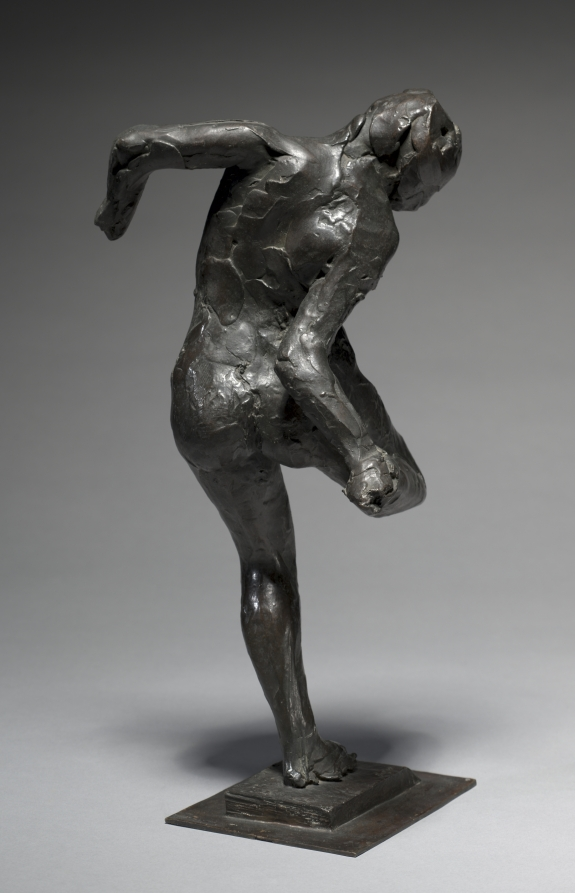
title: Dancer Looking at the Sole of her Right Foot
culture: France, 19th century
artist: Edgar Degas (French, 1834–1917)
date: 1896–97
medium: bronze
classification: Sculpture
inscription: Signed on base at left: Degas. Inscribed behind right foot: 67/B.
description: Degas produced numerous wax sculptures during his lifetime that were cast in bronze shortly after his death. This late work continues his fascination with dancers and the physical sensation of the human body in motion. Marks made by artist's fingers are visible in the bronze surface.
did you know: Degas often frequented the Garnier opera house in Paris to observe the dancers during both onstage performances and backstage rehearsals. Paying careful attention to their movements and poses, he produced nearly 1,500 works depicting ballet dancers, including paintings, drawings, and sculptures.